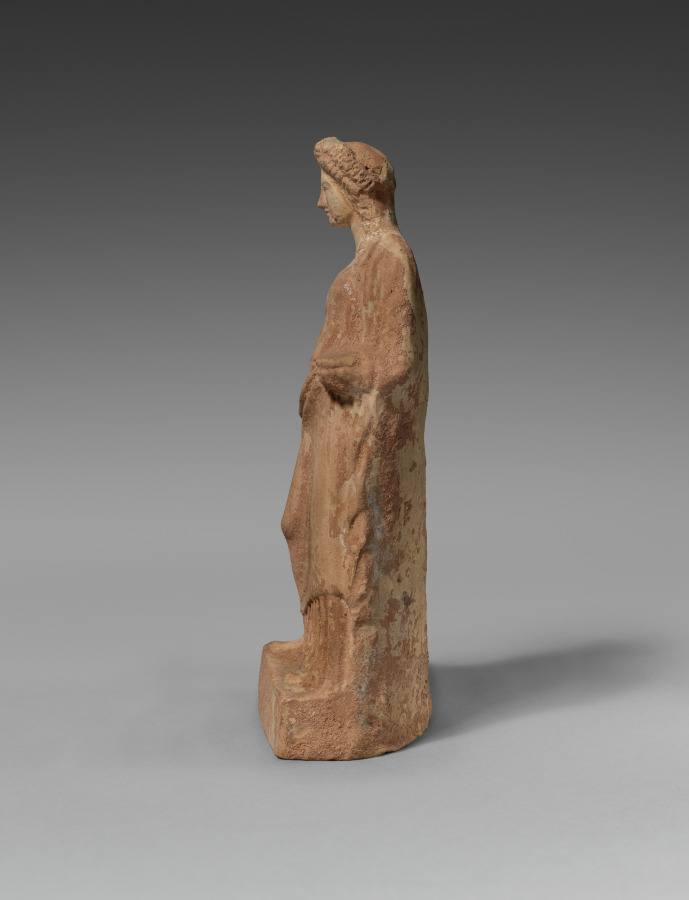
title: Figurine of Demeter with Pig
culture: Greece, Athens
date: 400s BCE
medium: terracotta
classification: Sculpture